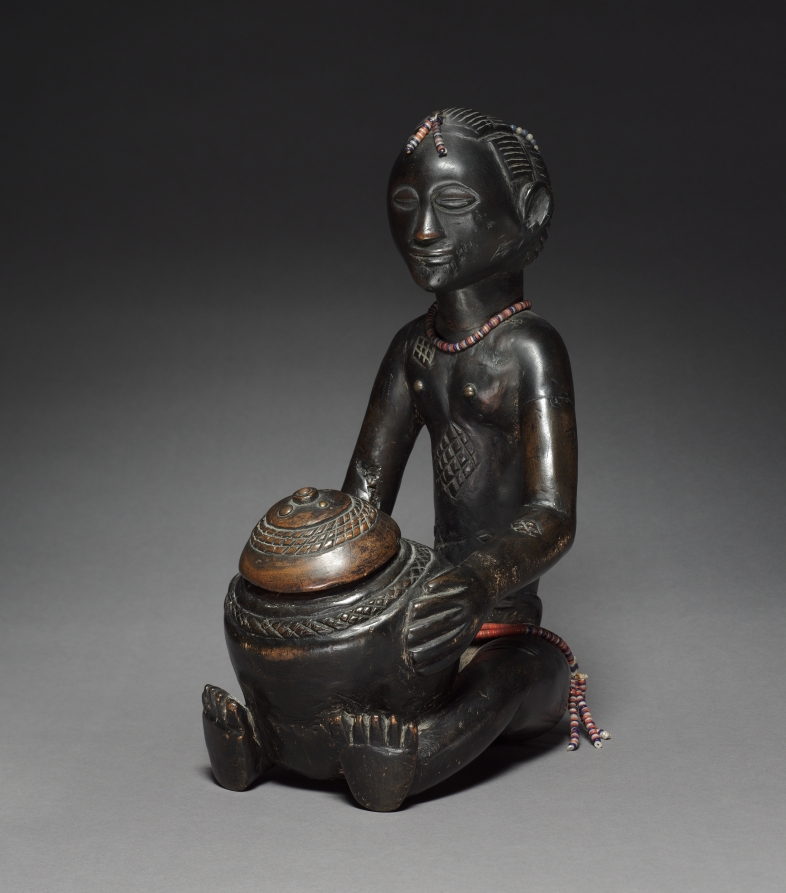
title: Female Bowl-Bearing Figure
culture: Africa, Central Africa, Democratic Republic of Congo, Luba-style carver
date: late 1800s-early 1900s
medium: Wood, glass beads, upholstery studs, plant fiber, and iron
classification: Sculpture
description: In Luba-style art, an object's beauty affects how well it works. While bowl-bearing figures had many possible uses, a royal diviner likely used this well-carved image of a woman carrying a bowl in rituals. Dusty traces of mpemba (white chalk) fleck the shining exterior and the bowl's interior, showing it once held this sacred powder. Diamond-shaped scarification marks at her waist, chest, and back add to her beauty. Her hair is carved into the cascading layered hairstyle worn in the Luba region at the turn of the twentieth century. Strands of imported glass beads encircle her waist and neck, and dangle from her hair. The alternating white and blue beads may symbolize the moon and Mbidi Kiluwe, a culture hero linked to royal practice and smithing. While much Luba-style art depicts women—who are societally important—men created and owned the majority of such works.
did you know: Symbolic of anvils, the round metal tacks decorating the figure's hair "pin" spirits and their secrets within it. They are at the hairline and each of the four hair cascades (the bottommost is now gone).